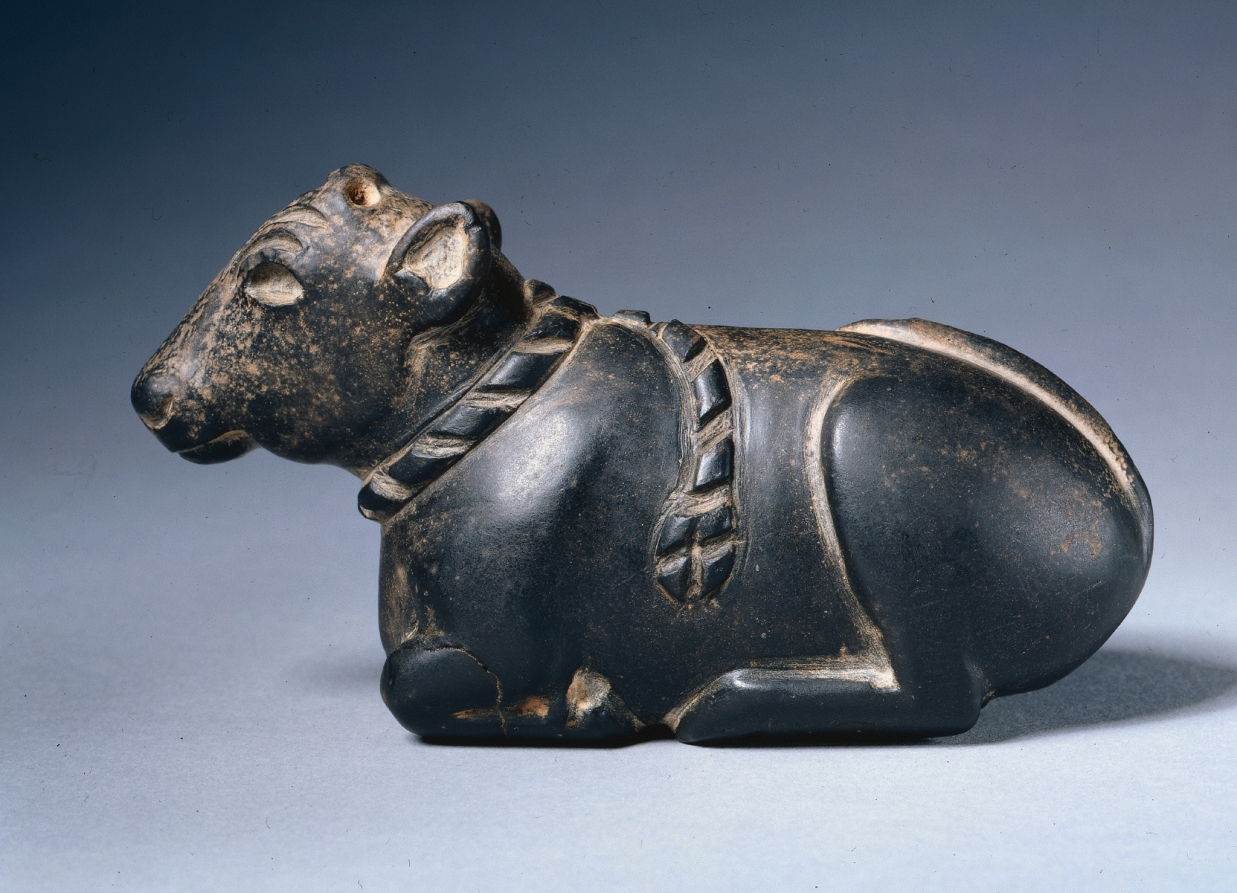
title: Bull Calf Polemount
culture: Sumerian, Iraq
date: c. 2700 BCE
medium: basalt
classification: Sculpture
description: Like most Mesopotamian sculptures in the round, this small bull was an object of worship in a temple. Its eyes, the triangle on the forehead, and the stripes in the rope were originally embellished with contrasting colored stones, or bone. The inlays are lost, but the sculpture itself is one of the very few original cult statues that have survived.